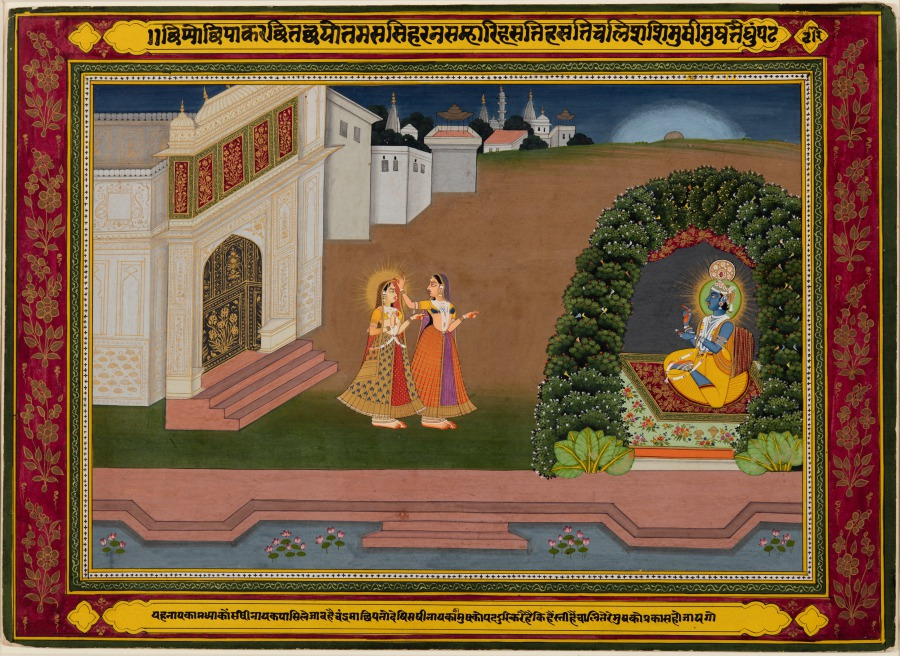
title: Radha’s Confidante Brings Her to Krishna, based on poetry of Bihari (Indian, 1595–1663)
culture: Northwestern India, Rajasthan, Rajput Kingdom of Jaipur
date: c. 1790–1800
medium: Gum tempera, ink, and gold on paper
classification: Painting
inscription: [on top margin] chippo chipā kara chita chato tama sasihara na samhāri hasatti hasatti cali śaśimukhī mukha ttai ghumghata tāri. [on bottom margin] yaha nāyakā madhyā koṃ sakhī nāyaka pāsi le jāva hai caṃdramā chipato dekhi sakhī nāyakā kā mukh ko pata duri karai hai ki haimstī haim cāli tere mukha ko prakāsa ho jāyago.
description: The blue god Krishna has spread a carpet and set up a canopy in a secret grove to create the space for a romantic tryst with his lover Radha. The wine-colored carpet with allover floral patterns match the canopy, and they are Persian in design. The ruler of the Hindu kingdom of Jaipur, who may have commissioned this painting, had an important collection of Persian carpets and textiles. Wine-and-gold curtains have been unrolled to cover the windows of the house behind Radha and her companion, indicating that she has left the house in secret after it has been closed up for the night.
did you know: Halos behind the heads of Radha and Krishna suggest their eminence as divine lovers.